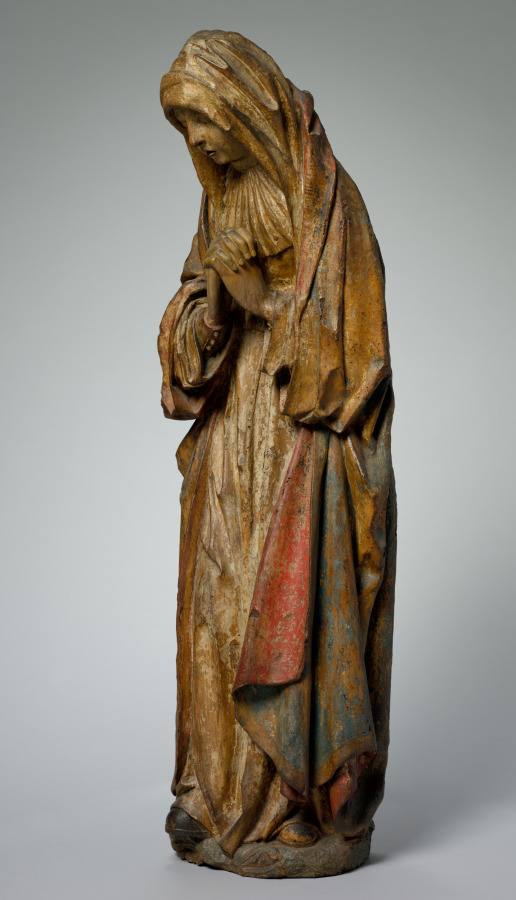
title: Virgin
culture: France, Champagne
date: 1510–15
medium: painted oak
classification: Sculpture